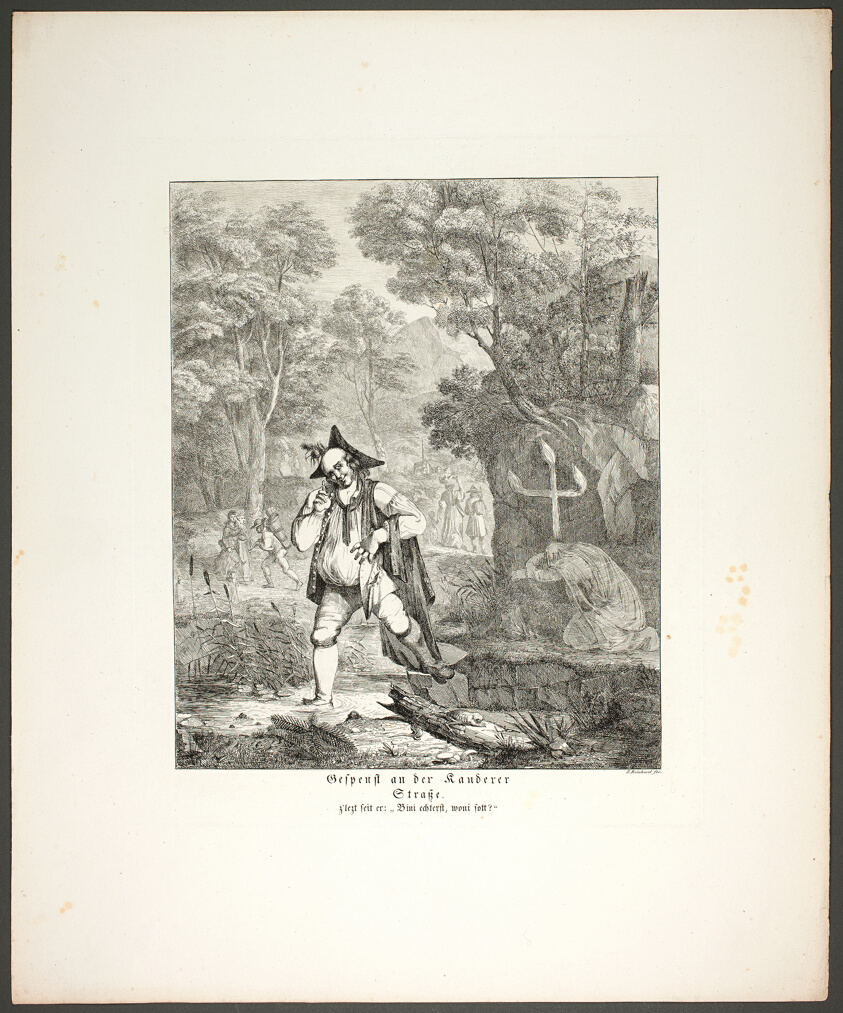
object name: Print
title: Ghost on the Kanderer Road (Gespenst an der Kanderer Strasse), plate six from the series Poems in the Dialect of the Upper Rhine Region (Zehn Blätter zu Hebels Alemannischen Gedichten)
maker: Sophie Reinhard (German, 1777-1843); published by Mohr und Winter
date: 1820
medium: Etching on cream wove paper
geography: Germany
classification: etching; print; prints and drawing